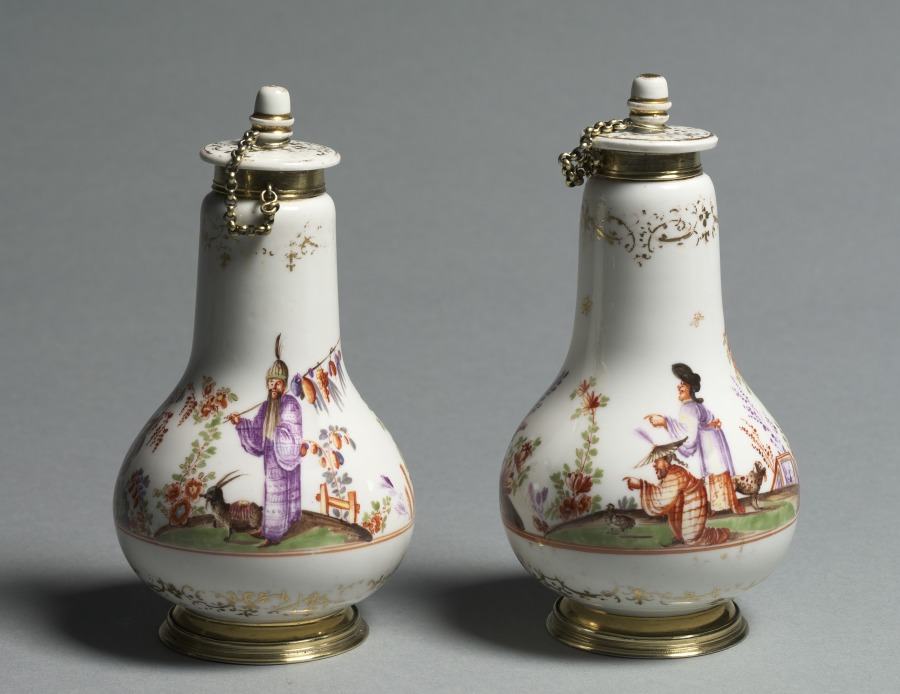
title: Covered Flasks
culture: Germany, Meissen, 18th century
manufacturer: Meissen Porcelain Factory (German, est. c. 1710)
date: c. 1720–1723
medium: porcelain with gilt metal mounts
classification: Ceramic